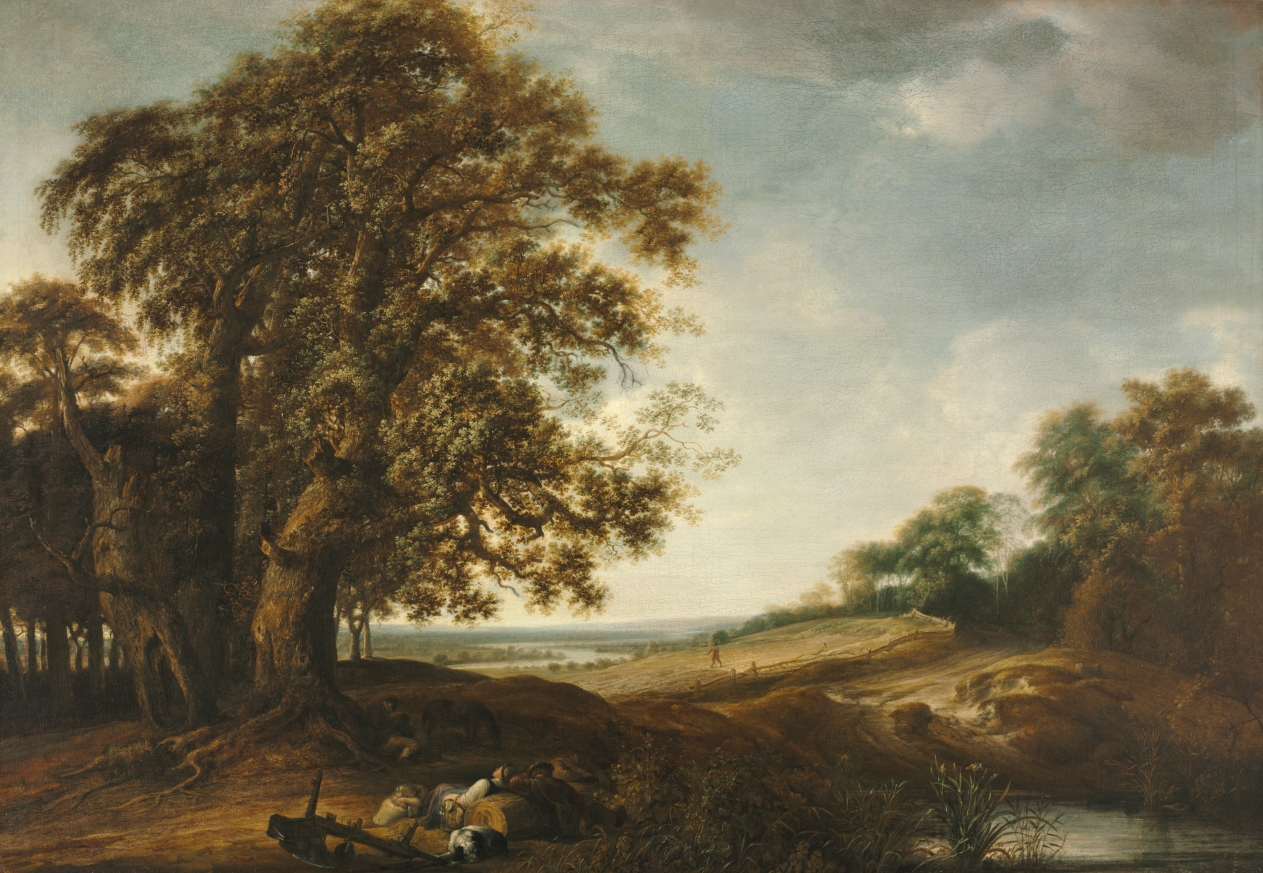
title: Sleeping Peasants near Fields (Parable of the Weeds)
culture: Netherlands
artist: Simon de Vlieger (Dutch, 1601–1653)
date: 1650–53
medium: oil on canvas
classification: Painting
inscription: Signed lower left: S. DE VLIEGER 16[5...]"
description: During the 1600s Protestant leaders denounced visual representations, in a belief that a strict understanding of the scriptures was the only way to achieve salvation. As a result, Protestants did not generally commission religious images. However, where religious painting did appear, they often depicted verses from the Bible with strict didactic values, such as Sleeping Peasants near Fields (Parable of the Weeds). The subject of this painting is the Parable of the Weeds from Matthew 13:24-30. Simon de Vlieger has illustrated the point in the story where the peasants sleep after sowing good seeds, and the enemy, depicted here as a satyr, mixes in bad seeds in the fields as well. When the weeds begin to grow, confused, the peasants ask the farmer if they should remove the seeds. The farmer replies that they should let the weeds and wheat grow together, and he will destroy the weeds after the harvest. The lesson of the story is that good and evil people often mix together; but in the end the pious will prevail and the wicked will be destroyed.